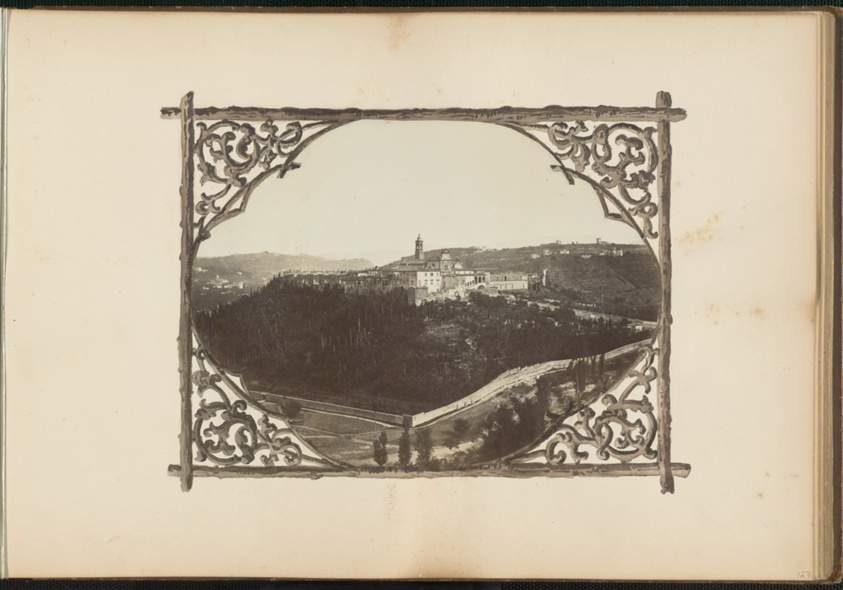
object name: Photograph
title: The Madame B Album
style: 19th century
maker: Marie-Blanche Hennelle Fournier (French, 1831–1906)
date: 1870s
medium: Albumen print with watercolor (in album)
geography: France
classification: photograph; albumen silver print; photography